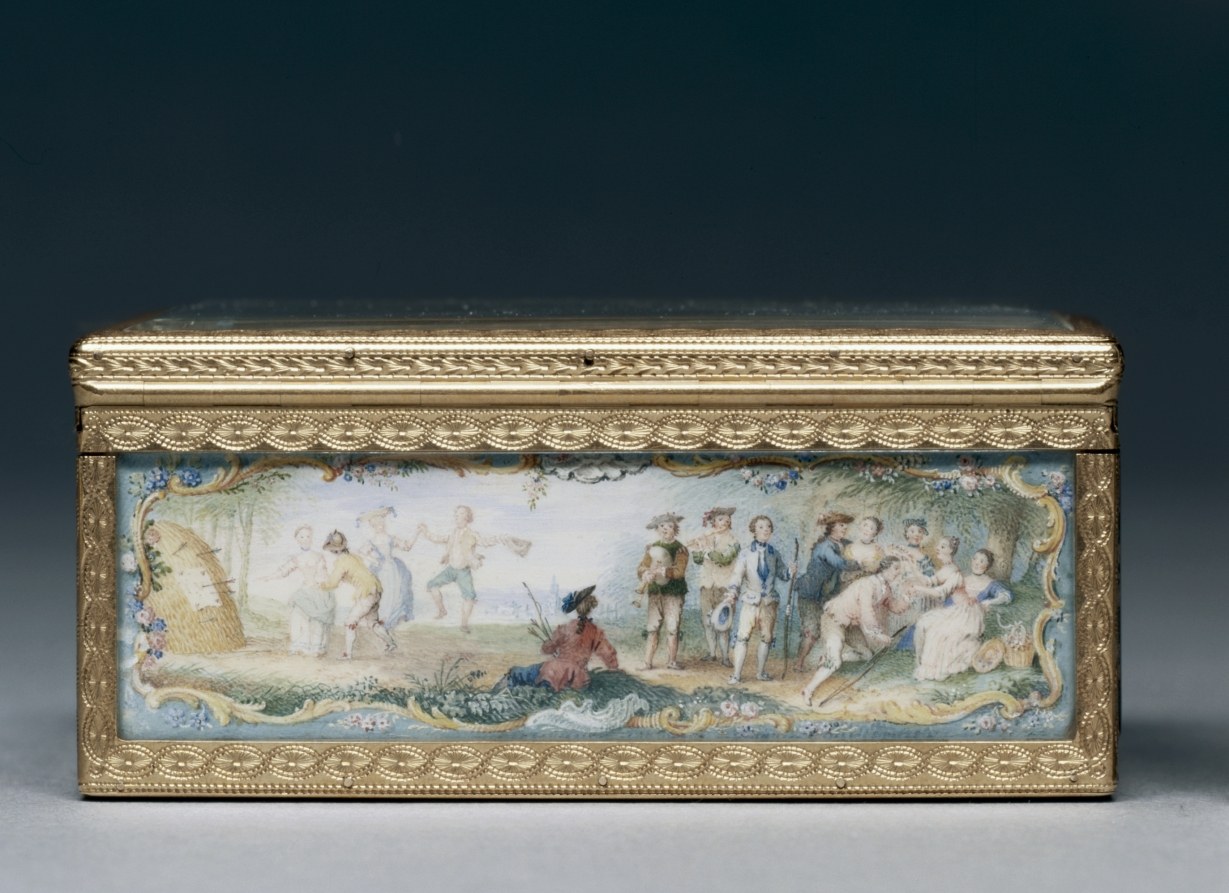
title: Snuff Box (Tabatière)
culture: France, 18th century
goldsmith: Jean Ducrollay (French, 1709–1787)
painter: Louis Nicolas van Blarenberghe (French, 1716–1794)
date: 1753–54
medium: gold and glass with miniatures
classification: Metalwork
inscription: [Maker's mark of Jean Ducrollay, master goldsmith in 1734, inside cover; bottom; right side]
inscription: [Charge mark of Julien Berthe, Paris, 1750-1756, inside cover; bottom; right side]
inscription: [Discharge mark of Julien Berthe, Paris, 1750-1756, on bezel]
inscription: [Inscribed on miniature, front side]: "V.[an] Blarenberghe/1753"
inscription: [Warden's mark for Paris, 1763-1754, inside cover; bottom; right side]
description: In 18th-century France ornately enameled boxes that held snuff—powdered tobacco—became a popular accessory in the French court. This object’s rectangular shape differs from early work attributed to Jean Ducrollay. Though the light colors, floral borders, and depictions of lively outdoor recreation are representative of earlier rococo imagery, the rectangular shape and simple frieze make it a primary example of rising neoclassicism.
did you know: The Ducrollay family was one of the most sought-after Parisian goldsmith workshops under the reign of French King Louis XV.